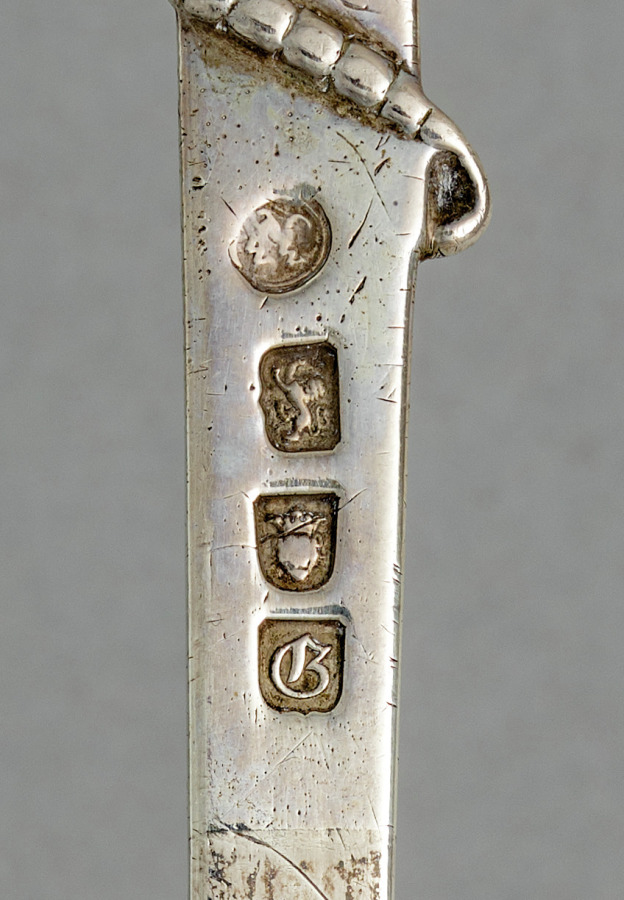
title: Skewer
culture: England, London, 18th century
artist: firm of Charles Wright (British)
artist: firm of Thomas Whipham (British)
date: 1762–1763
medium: silver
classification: Silver